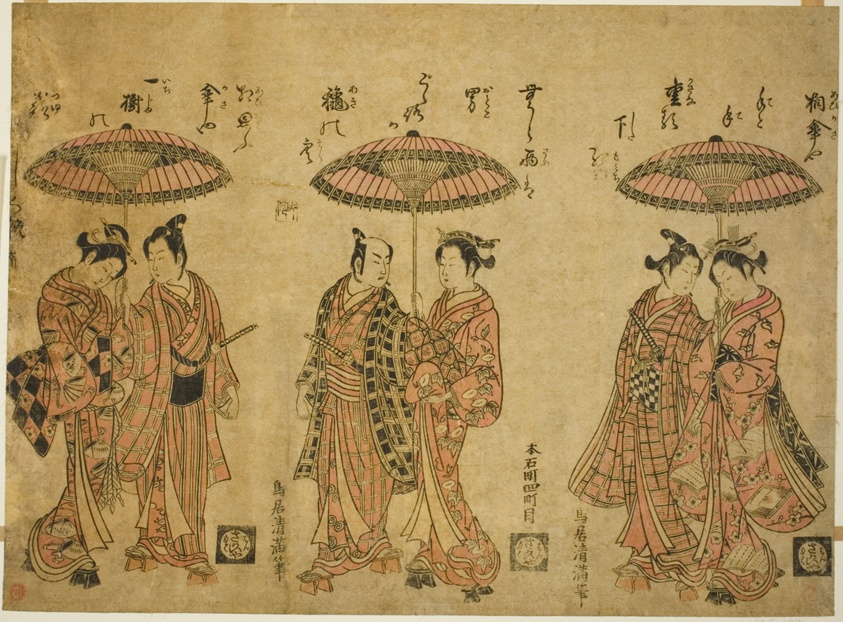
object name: Print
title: Three couples sharing umbrellas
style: Japanese (culture or style)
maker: Torii Kiyomitsu I (Japanese, 1735-1785)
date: c. 1760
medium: Color woodblock print; uncut hosoban triptych, benizuri-e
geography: Japan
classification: woodblock print; print; asian art